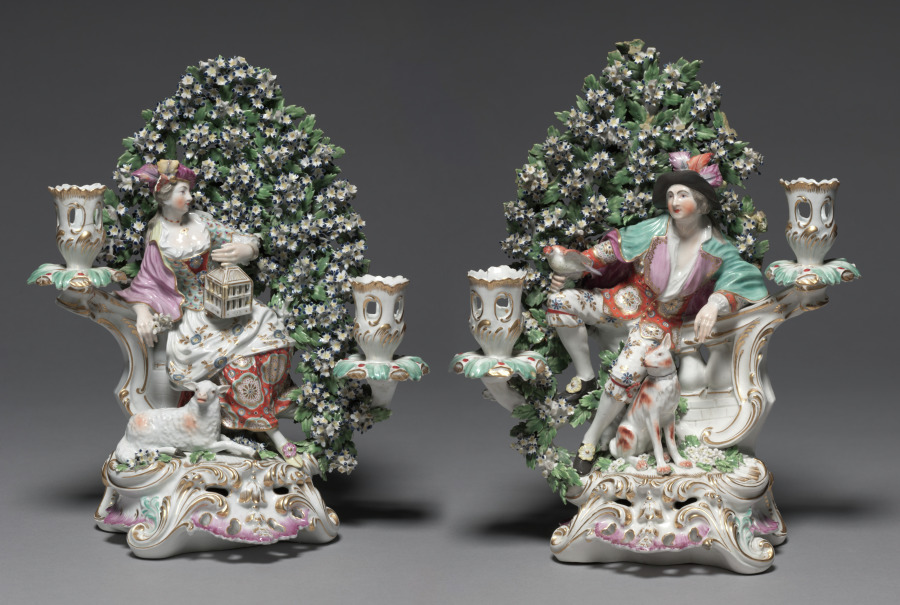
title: Pair of Candelabra Depicting Allegorical Figures of Liberty and Matrimony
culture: England, London, Chelsea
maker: Derby Porcelain Factory (Chelsea-Derby Period, 1770–84)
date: c. 1775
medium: soft-paste porcelain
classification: Ceramic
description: This pair of allegorical figures depicts the attributes of solitude and marriage as a shepherd and shepherdess adorned in richly patterned designs. Here “Liberty” (the shepherd), is accompanied by a dog and a bird that perches on his outstretched arm. In contrast “Matrimony” (the shepherdess) holds a birdcage in one hand and subtly directs the viewer’s gaze toward the sheep resting nearby with the other.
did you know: The canopy of foliage surrounding these figures was inspired by the arbors popular in theatrical stage designs during the mid-1700s.